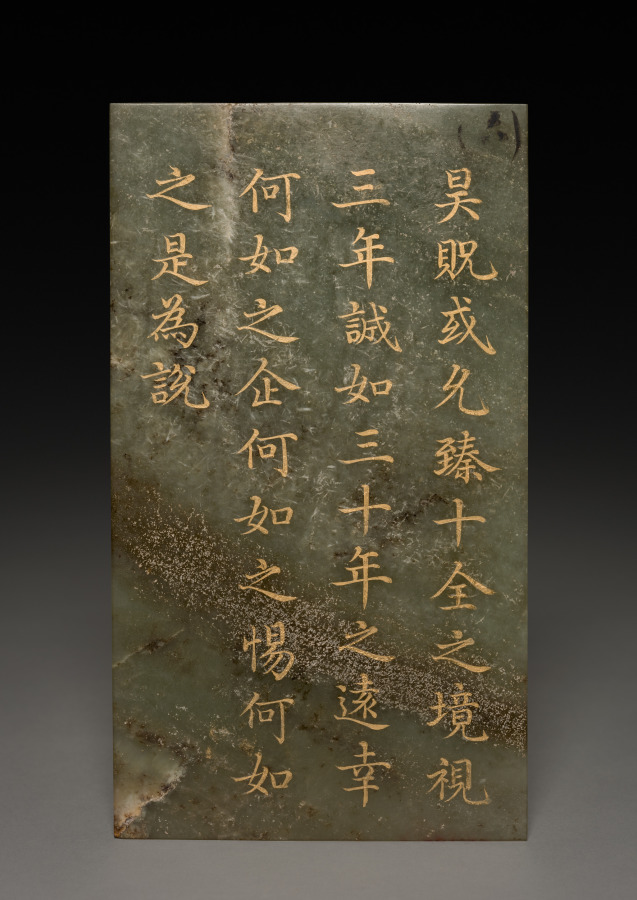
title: Tablet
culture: China, Qing dynasty (1644–1911), Qianlong reign (1736–95)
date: 1778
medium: jade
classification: Jade